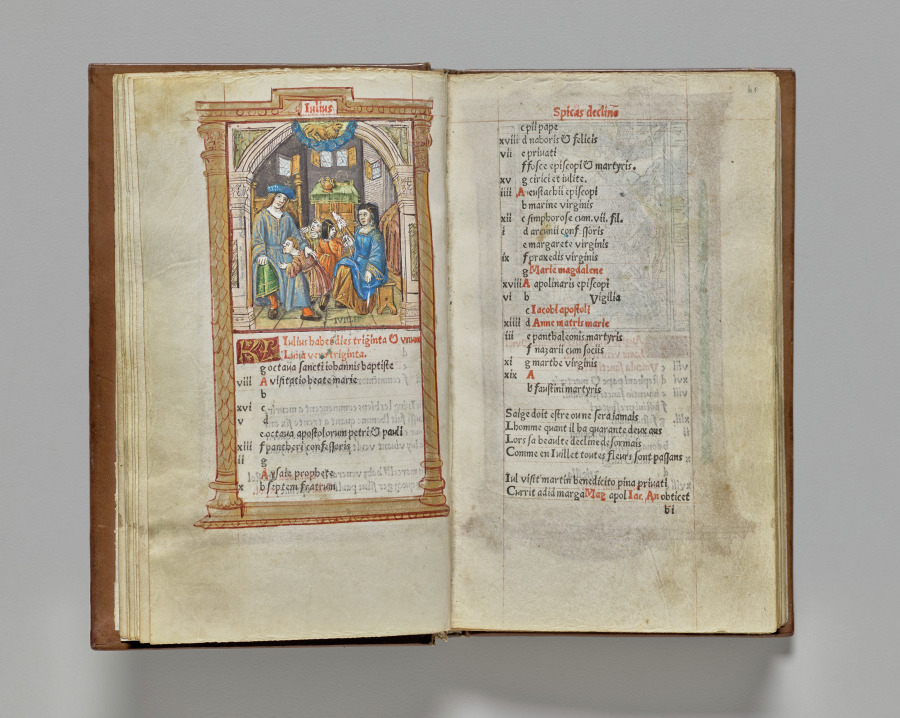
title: Printed Book of Hours (Use of Rome): fol. 8v, July calendar illustration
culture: France, Paris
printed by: Guillaume Le Rouge (French, Paris, active 1493–1517)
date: 1510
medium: 112 Printed folios on parchment, bound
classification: Bound Volume